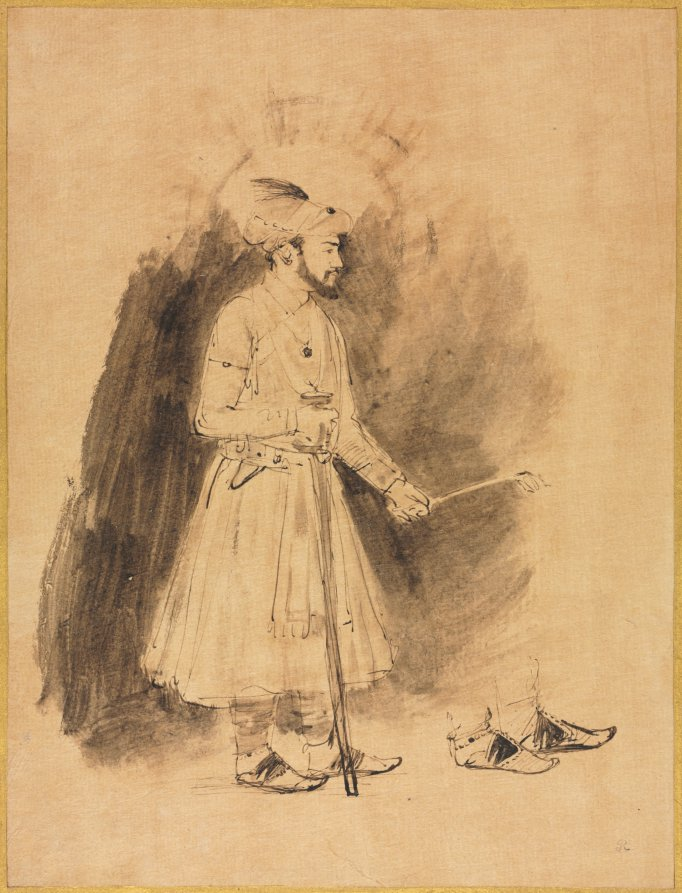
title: Shah Jahan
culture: Netherlands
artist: Rembrandt van Rijn (Dutch, 1606–1669)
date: c. 1656–61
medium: pen and brown ink and brush and brown wash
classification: Drawing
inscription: On verso of secondary support, upper center, in graphite: Portrait of; upper center, in brown ink: Portrait of Sháh Jahán Emperor of Hindustan [inscription in English] / Shah Jahan Padshah [inscription in Persian]; upper right, in graphite: Ouseley / written by Sir Gore Ou[seley] 1809; lower left, in graphite: 334; fragment of old mount (now removed), in blue pencil: 3[crossed out with black ink]; fragment of old mount (now removed), in gray ink: Portrait of Sháh Jehán / Emperor of Hindûstan; in black ink: 5[written over 5 in graphite] Indian Prince [underlined]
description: Rembrandt’s drawing portrays Shah Jahan, the ruler of the Mughal Empire from 1628-58. It is one of twenty-three drawings that Rembrandt made after Indian miniatures, which he had very likely studied in an album then in Holland. By the 18th century, the album had been dismantled, and the model for this drawing now resides at the Schloss Schönbrunn, Vienna. Rembrandt imposed his characteristic realist tendencies on a more detailed, formal, and stylized model, bringing the shah to life with especially fine pen strokes on the face and shoes mixed with evanescent brown ink washes around the figure that introduce a dynamic interplay of light, shade, and figure. Above the shah’s head, he scratched away parts of the ink and paper to create a nimbus shape that frames the profile. His meticulous technique and use of a rare and expensive Japanese paper suggest that he regarded his drawings after Mughal paintings as exceptional.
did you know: The Mughal ruler portrayed in this drawing carries a fly swatter in his left hand.